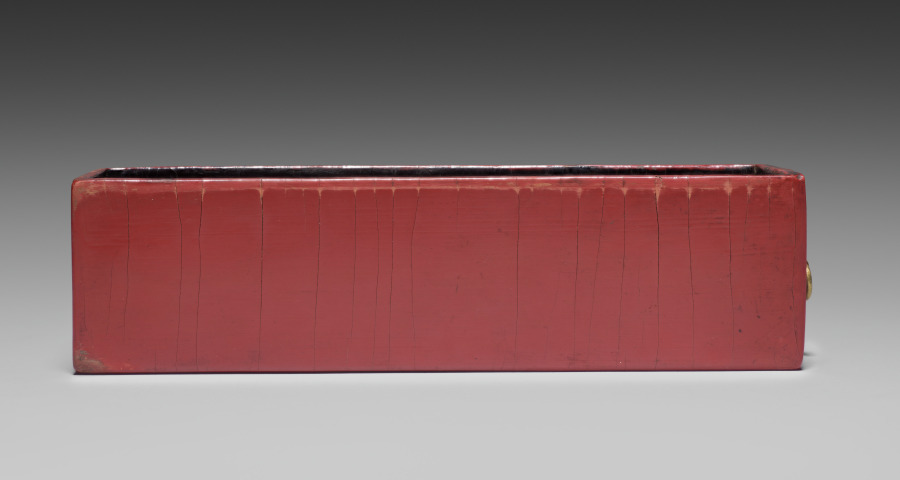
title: Drawer for a Tihong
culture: China, Ming dynasty (1368-1644), Wanli reign (1572-1620)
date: 1585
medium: carved cinnabar lacquer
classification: Lacquer